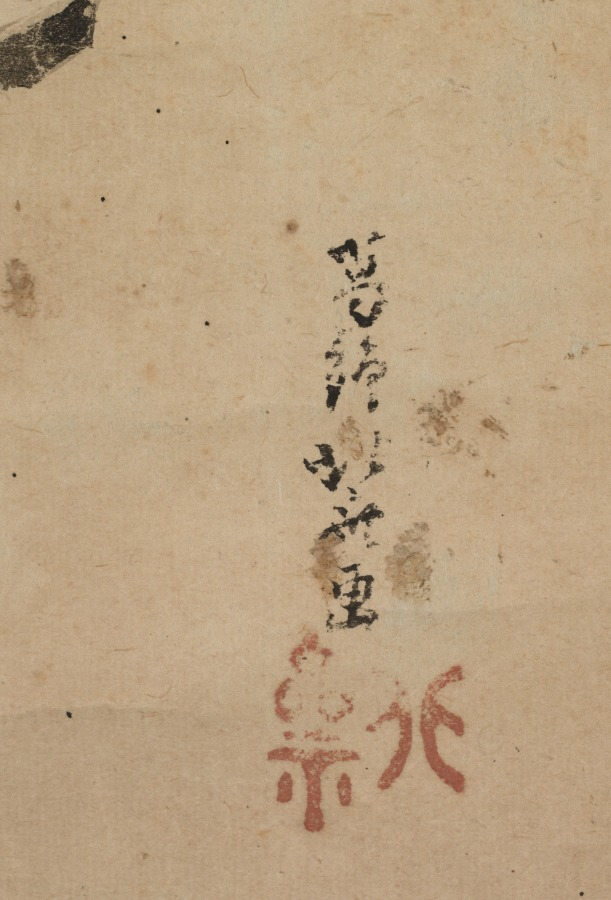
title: Beauty (Bijin)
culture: Japan, Edo period (1615–1868)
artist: Katsushika Hokusai (Japanese, 1760–1849)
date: c. 1775–1849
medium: hanging scroll; ink and color on paper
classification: Painting